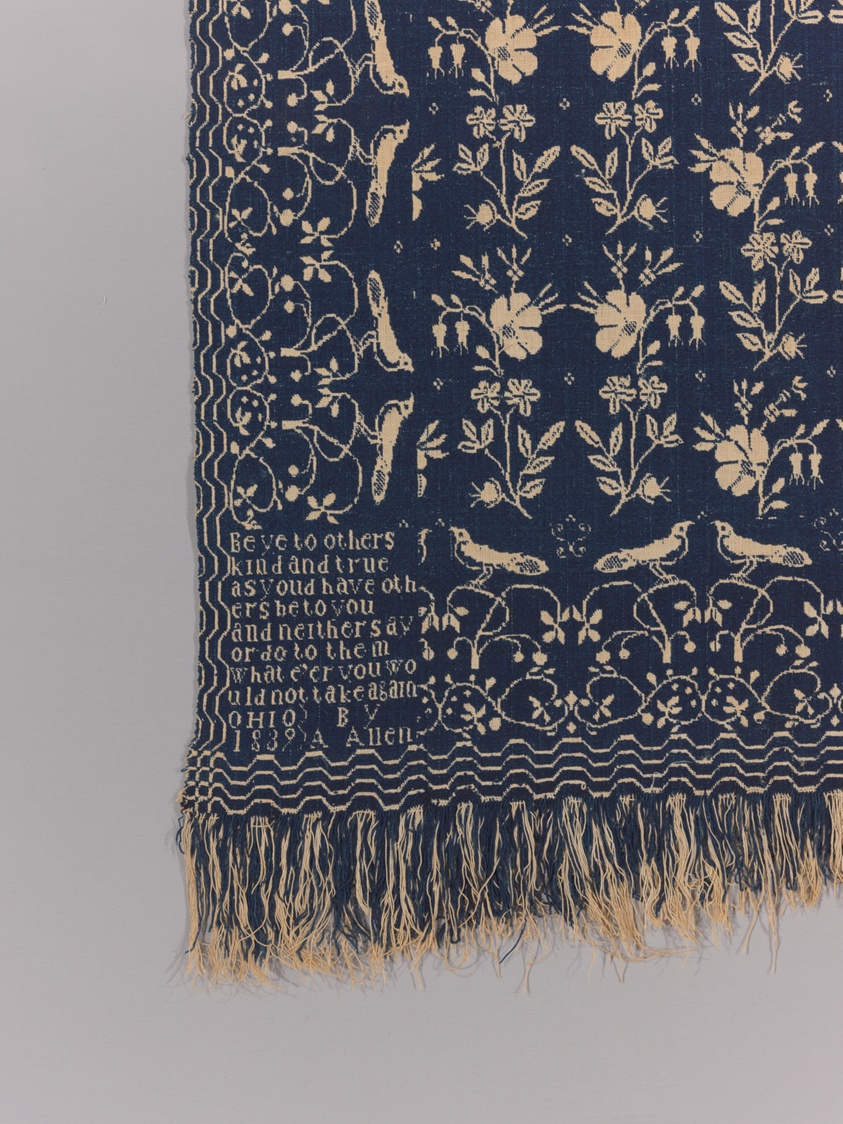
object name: Textile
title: Coverlet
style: 19th century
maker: Abram Allen (American, born Irish, c. 1796- after 1860); United States, Ohio, Clinton County, Wilmington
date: 1839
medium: Cotton and wool, plain weave double cloth with main warp fringe; woven on loom with Jacquard attachment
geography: Ohio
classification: textile; coverlet; weaving - coverlet; weaving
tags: flowers, words, vines, primrose, fruit, friendship, foliage, birds, bird, coverlet